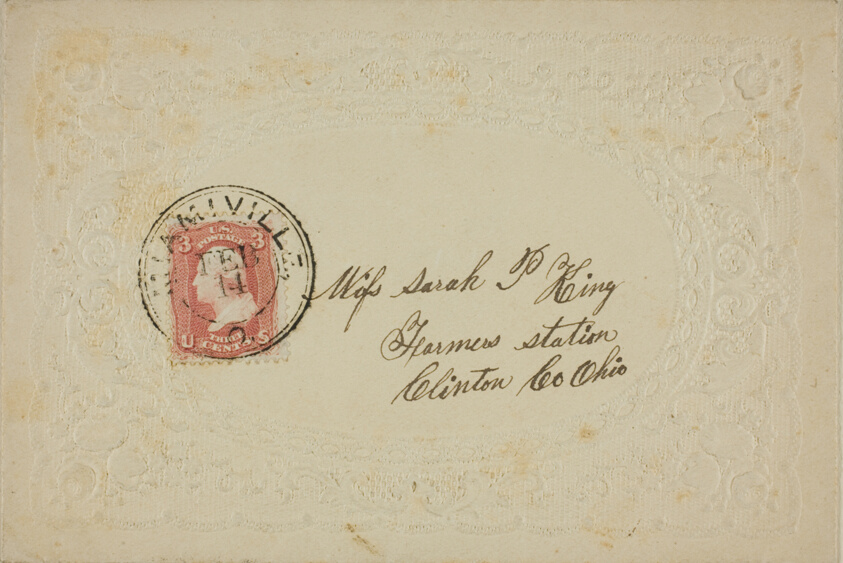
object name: Print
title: Valentine envelope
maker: Unknown Artist; American, 19th century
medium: Embossed cream wove paper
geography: United States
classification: valentine; prints and drawing; print